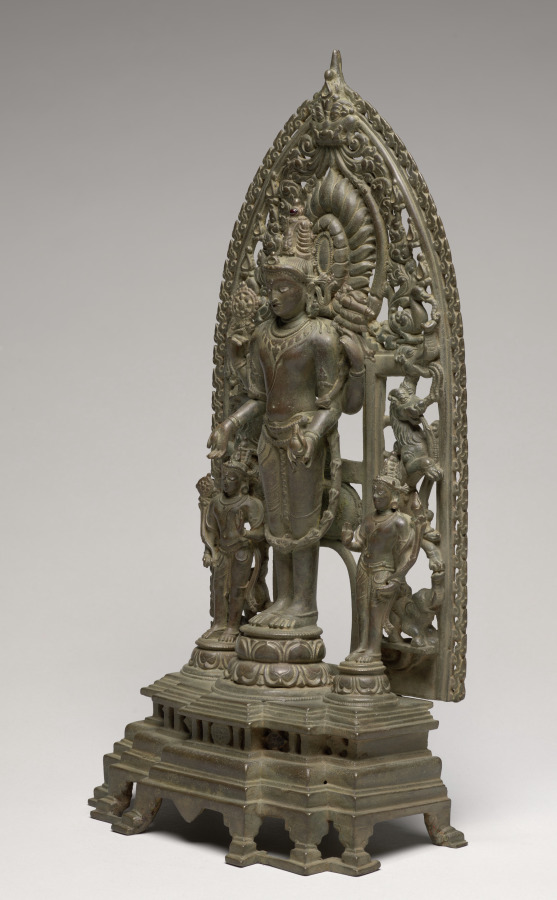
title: Vishnu Attended by Chakrapurusa and Shankhapurusa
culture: East India, Bengal, Pala period, 11th-12th century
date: 1000s–1100s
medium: bronze with silver inlay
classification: Sculpture